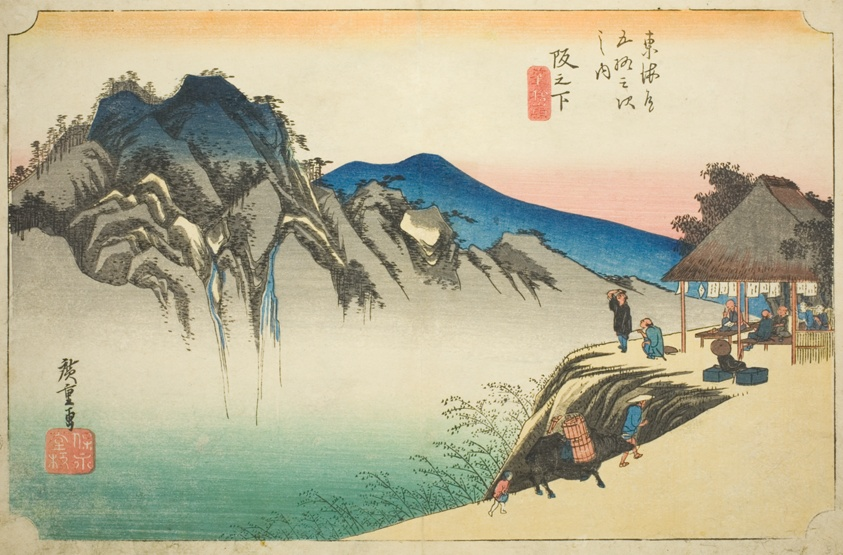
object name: Print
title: Sakanoshita: Peak of Fudesute Mountain (Sakanoshita, Fudesute mine), from the series "Fifty-three Stations of the Tokaido (Tokaido gojusan tsugi no uchi)," also known as the Hoeido Tokaido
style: Japanese (culture or style)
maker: Utagawa Hiroshige 歌川 広重; Japanese, 1797-1858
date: c. 1833/34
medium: Color woodblock print; oban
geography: Japan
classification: woodblock print; print; asian art